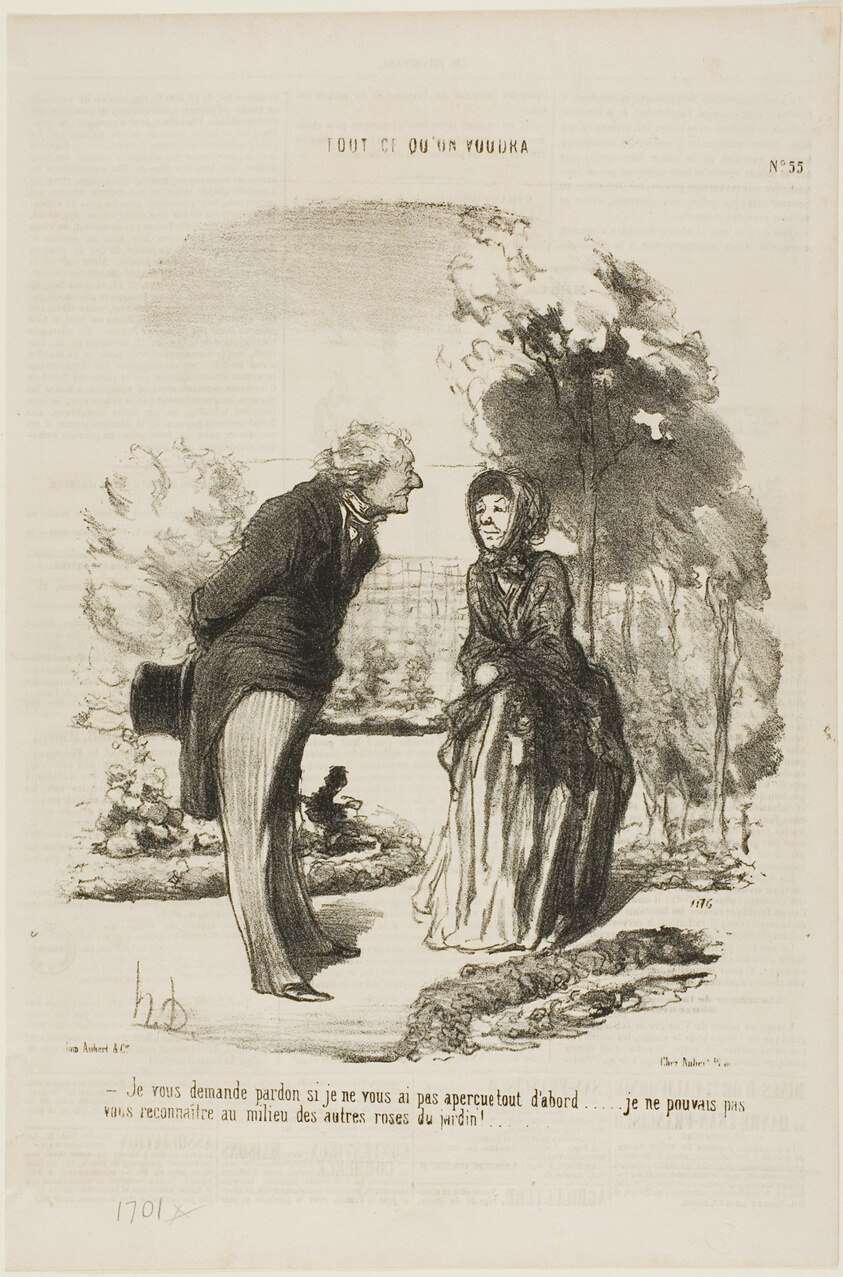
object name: Print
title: “- I am sorry that I did not recognize you right away. I could not distinguish you from all the other roses!,” plate 55 from Tout Ce Qu'on Voudra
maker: Honoré Victorin Daumier; French, 1808-1879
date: 1850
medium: Lithograph in black on ivory wove paper, with letterpress verso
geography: France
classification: lithograph; print; prints and drawing